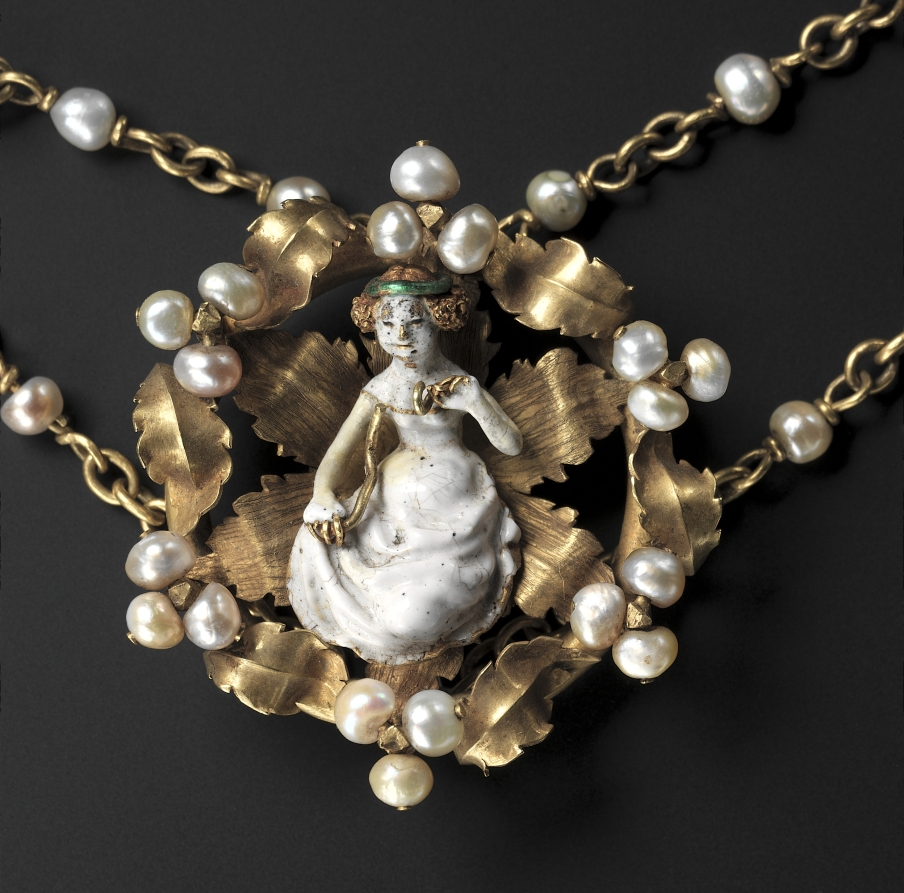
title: Twelve Medallions Mounted as a Necklace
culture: France, Paris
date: c. 1400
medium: enameled gold, precious stones, and pearls; some later additions with modern chain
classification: Jewelry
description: These medallions, which have loops on the backs, must have originally been sewn onto a garment or, more likely, a woman’s headpiece. In spite of the modern chain to which they are now attached, the medallions are unique items of feminine apparel from around 1400. Such items would have been well known at the courts of the Valois in Paris, Bourges, and Dijon. The central medallion with a “white lady” is enameled “in the round”––a new Parisian technique for enameling irregular or three-dimensional surfaces. Such white lady medallions are described in inventories of the period